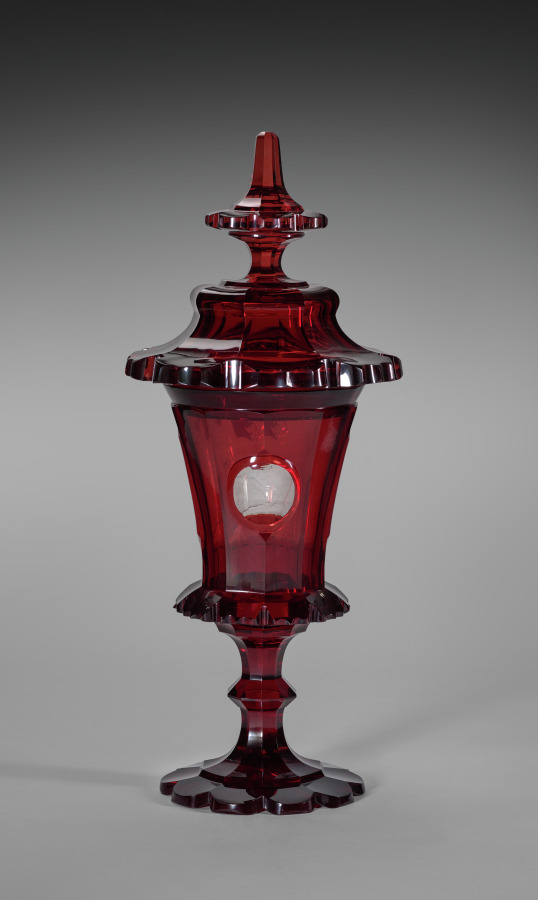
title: Covered Cup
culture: Bohemia, 19th century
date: mid-1800s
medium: ruby glass with engraved decoration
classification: Glass